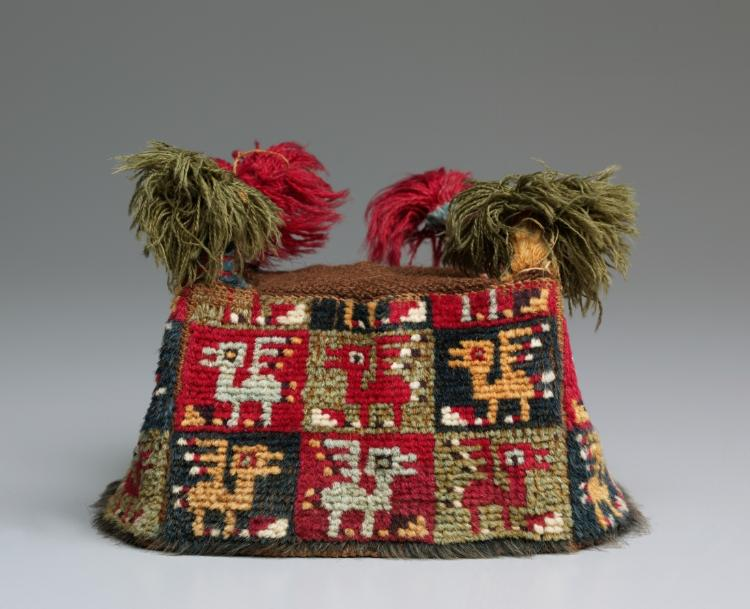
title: Four-Cornered Hat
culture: Peru, South Coast, Wari Culture, Middle Horizon, 8th-11th Century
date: c. 700–1100 A.D.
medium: needle network with cut pile: cotton and wool; reseau for top: cotton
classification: Textile